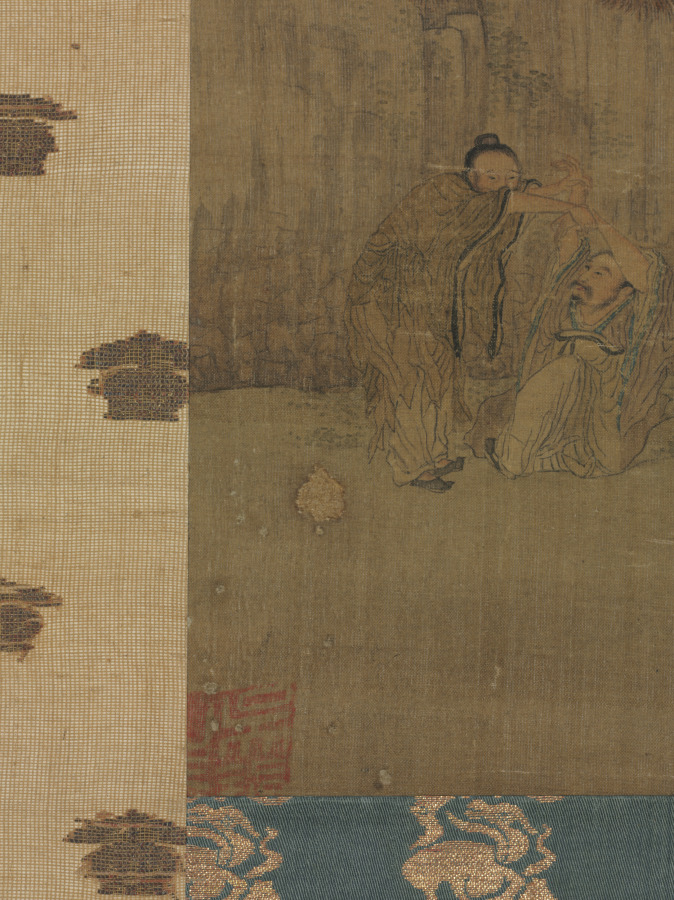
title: Listening to the Qin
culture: China, Ming dynasty (1368–1644)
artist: attributed to Tang Yin (Chinese, 1470–1523)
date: late 1400s–early 1500s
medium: hanging scroll; ink and light color on silk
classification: Painting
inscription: Artist's seal at lower left corner: Wu [remainder cut off].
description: The painting alludes to a legendary incident from the life of Ji Kang 嵇康 (AD 223–262), a guqin player who belonged to a group of 3rd-century eccentric intellectuals. Ji Kang is known as the author of a Guangling San (廣陵散; Melody from Guangling), a composition for the guqin so haunting that it aroused spirits to visit him. The painting depicts the moment when one of the spirits––disguised as a human––is helped by another to emerge from the ground, while others are drawn to the musician playing in his cottage under the full moon.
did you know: The painting is mounted in a Japanese-style three-tier format with futai.